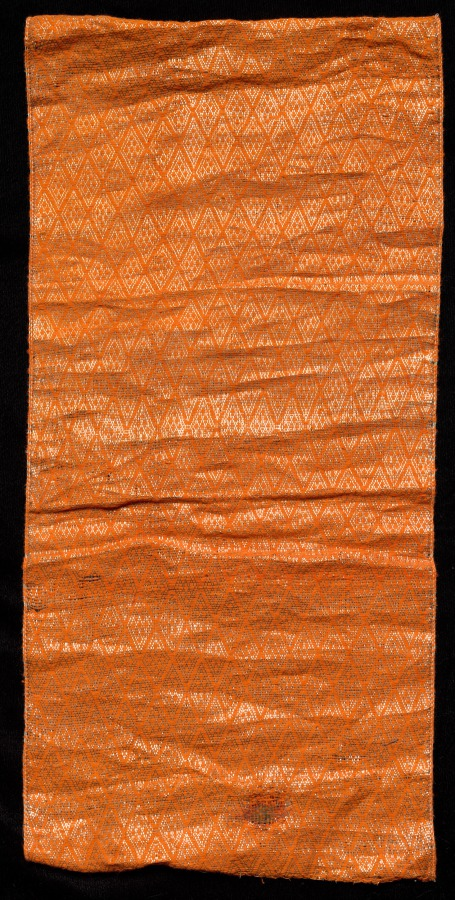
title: Piece of a Turban (Pugri)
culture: India, Chanderi, 19th century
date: 1800s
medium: cotton with metal woven in diamond design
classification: Textile